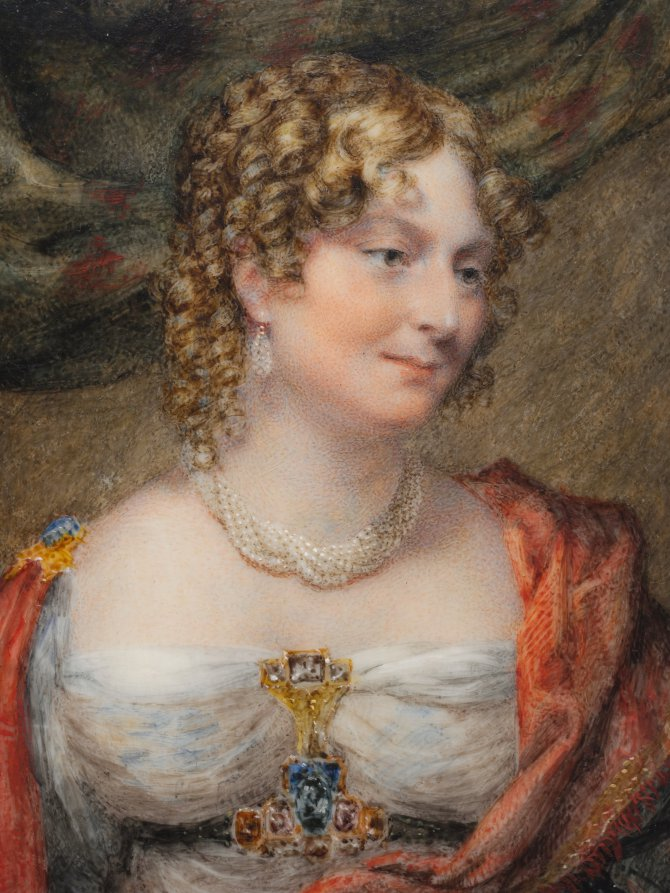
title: Portrait of Anne Law (née Towry), 1st Lady Ellenborough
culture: England, 19th century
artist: John Linnell (British, 1792–1882)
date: c. 1821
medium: watercolor on ivory heightened with gum arabic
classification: Portrait Miniature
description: John Linnell was born and lived much of his young adulthood in Bloomsbury, where his father, James, made picture frames and restored paintings. As a boy the artist trained briefly with Benjamin West (1738–1820) and John Varley (1778–1842) before becoming a student at the Royal Academy from 1805 to 1812. Though primarily known for his landscapes, Linnell was also a prolific portraitist and executed miniatures during the first two decades of his career, learning the medium from his neighbor James Holmes (1770–1860). According to an early biographer, Linnell began painting miniatures around 1818 with a portrait of his wife. By 1823 he had executed a number of miniature commissions from aristocratic patrons, including Princess Sophia, facilitated by the praise of the society maven Lady Stafford. He painted his last known miniature on ivory in 1832. During the approximately fifteen years that the artist painted miniatures, he consistently charged between 10 and 50 guineas for a portrait. These fees corresponded less to the size of the ivory than to the degree of finish and elaboration of the composition. In this portrait Anne Law (née Towry), 1st Lady Ellenborough (c. 1769–1843), is depicted half length. She wears a high-waisted white dress of translucent fabric through which a hint of blue appears and around which she wears a black belt. A devant de corsage (stomacher, or bodice brooch) is worn at her décolletage, extending to the belt. Its gold framework contains at least twelve semiprecious stones colored blue, red, aquamarine, pink, and brown. A gold brooch with a large blue stone is pinned to the cloak at her right shoulder. She also wears a twisted multistrand pearl necklace, matching pearl pendant earrings, and two gold rings on her left ring finger. A dark gray-green shawl with red reverse, gold border, and red fringe is draped over her shoulders and arms. She holds a closed fan in her left hand and stands against a brown background featuring a green and auburn striped curtain in the upper left corner. The sitter’s fair hair is dressed in ringlets that fall at her neck. The miniature is housed in a standing gilt metal and red velvet frame that dates from the same period.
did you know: Lady Ellenborough was described as “so exceedingly lovely, that passengers would linger to watch her watering the flowers—such was the fashion of the day—on the balcony of their house in Bloomsbury Square.”